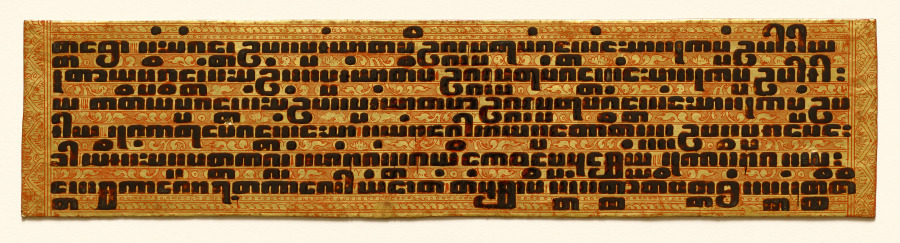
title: Text, folio 4 (recto) from a Kammavacha: Buddhist ordination text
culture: Myanmar (Burma)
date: 1800s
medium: Leaf: lacquer and gilding on cloth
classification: Manuscript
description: In premodern Burma, lay people commissioned lavishly ornamented manuscripts for ceremonial occasions, when officiants would read aloud from the text. Written in black lacquer, the text is in the language of Pali written in a Burmese script. It contains ordination rites and procedures for monastic ceremonies. The second to last page is covered with intricately drawn, winged celestial beings (nats) in gestures of praise. They fly amid intertwining vegetation—denoting bounty—that grows from serpentine forms that refer to rain clouds. Lionlike forms inhabit the space with them. The top and bottom covers are equally ornamented with jeweled floral patterning.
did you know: The Pali text of this manuscript is written in Burmese square script, which is also known as "tamarind seed script."